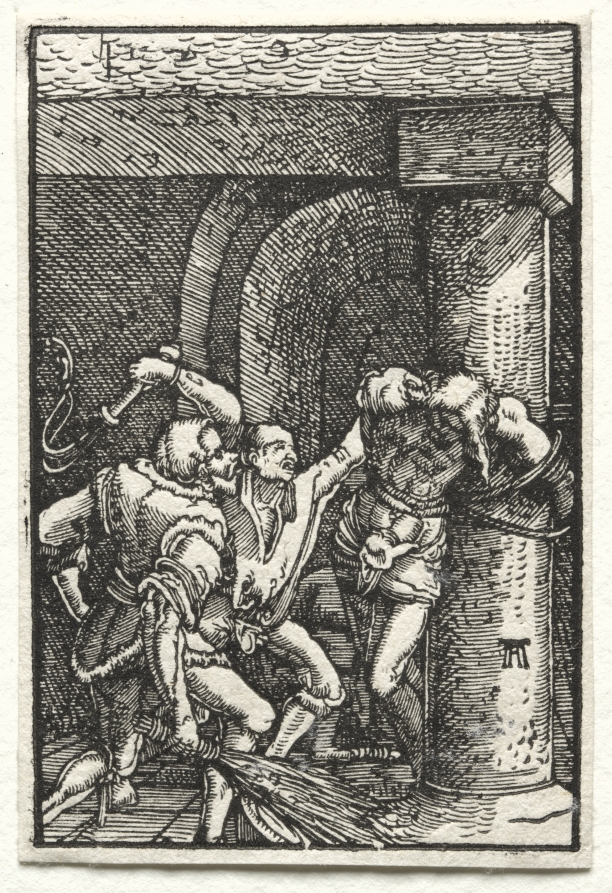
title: The Fall and Redemption of Man: Flagellation of Christ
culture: Germany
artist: Albrecht Altdorfer (German, c. 1480–1538)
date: c. 1515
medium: woodcut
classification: Print